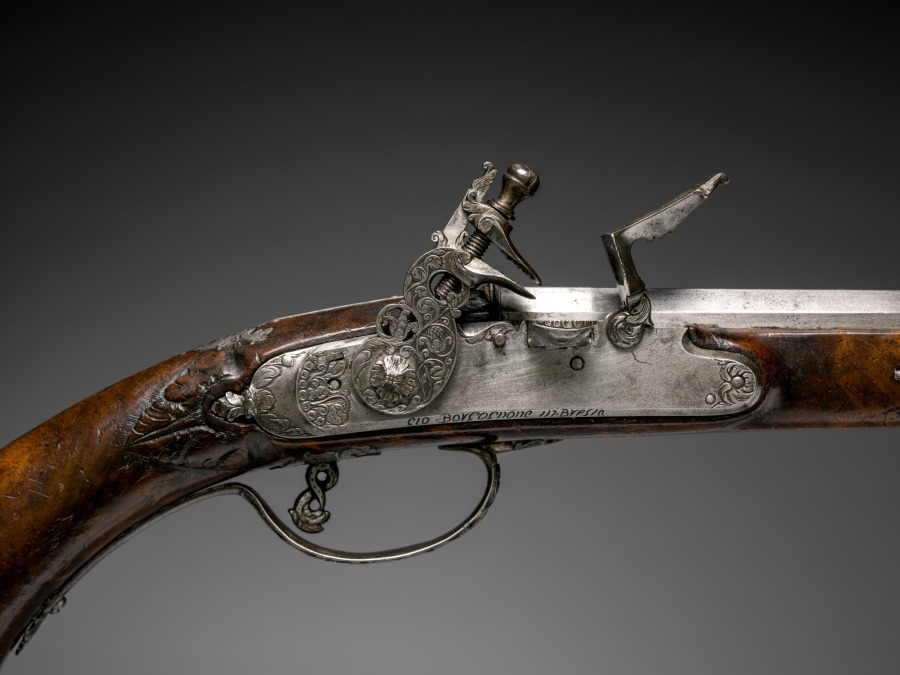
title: Flintlock Pistol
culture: Italy, Brescia, late 17th century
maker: Gio Borgognone (Italian)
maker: Lazarino Cominazzo (Italian)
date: c. 1690–1700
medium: steel, chiseled steel with walnut stock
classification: Arms and Armor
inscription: barrel signed: Lazarino Cominazzo; lockplates signed: Gio Borgognone in Bresia